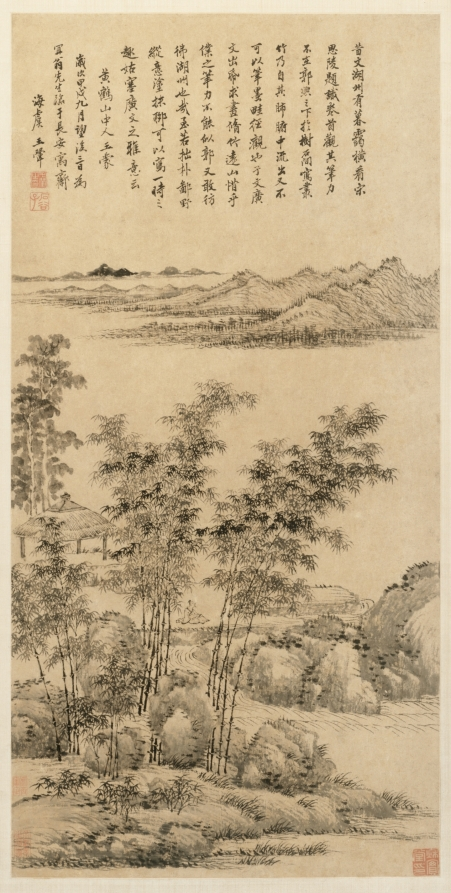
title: Tall Bamboo and Distant Mountains, after Wang Meng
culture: China, Qing dynasty (1644-1911)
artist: Wang Hui (Chinese, 1632–1717)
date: 1694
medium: Hanging scroll; ink on paper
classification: Painting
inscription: 昔文湖州有暮靄橫看。宋思陵題識卷首：觀其筆力不在郭煕之下。於樹石間寫叢竹，乃自其肺腑中流出，又不可以筆墨畦徑觀也。 子文廣文出紙求畫修竹遠山。惜乎僕之筆力，不能似郭。又敢彷彿湖州也哉？至若拙朴鄙野，縱意塗抹，聊可以寫一時之趣。姑塞廣文之雅意云。黃鶴山中人王蒙書。 歲次甲戌九月望後三日為冝翁先生臨于長安寓齋。海虞, 王翬。[印]王翬之印; 石谷子.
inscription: 3 additional seals: 1 of Pang Yuanji 龐元濟 (1864–1949); 2 unidentified.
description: Wang Hui studied paintings by earlier masters and digested their styles with unceasing virtuosity. He had such enduring affection for a landscape by Wang Meng 王蒙 (about 1308–85) that between 1686 and 1712, he made several copies, like this example. One of his compositional transformations here was moving the scholar from the pavilion directly into the landscape by the stream. His faithful copying also included inscriptions. Wang Meng had written that he was trying to resuscitate the style of an earlier artist, Wen Tong (1018–1079); therefore, Wang Hui sought to revive both Wang Meng and Wen Tong.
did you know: As a leading figure in the Orthodox School of Chinese painting, Wang Hui believed that the act of painting was a dialogue with one or more masters of the past.